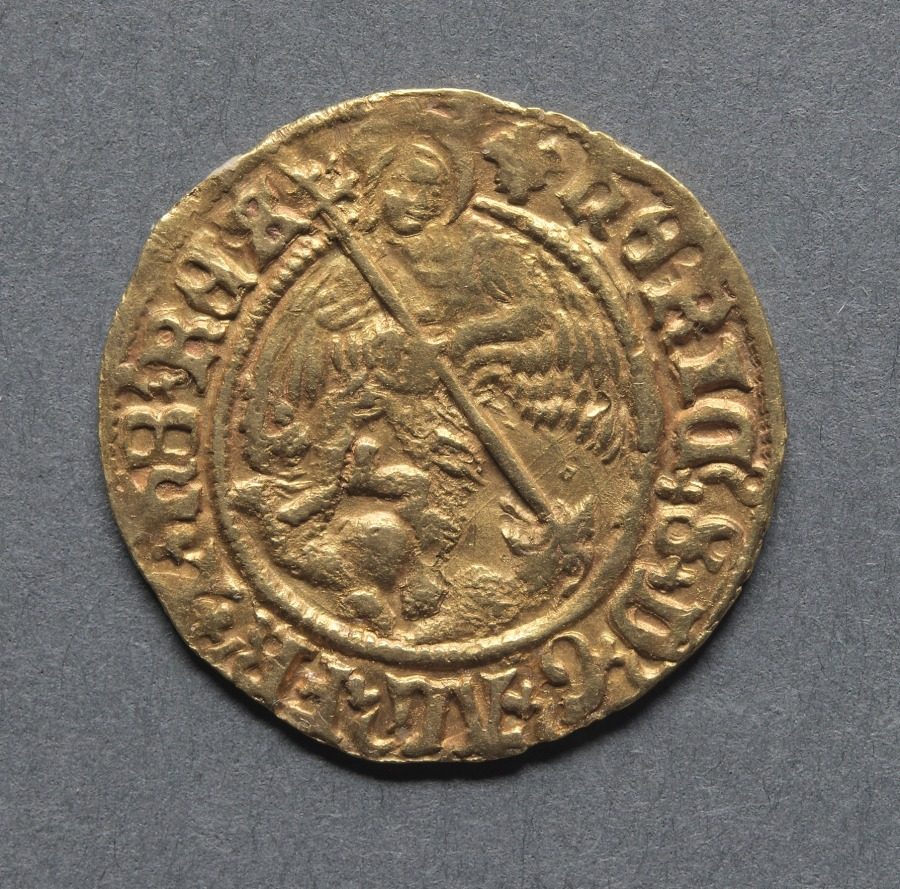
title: Half Angel: Angel Slaying a Dragon (obverse); Ship with Shield of Arms (reverse)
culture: England, Henry VIII, 1509-1547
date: 1526–44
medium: gold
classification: Coins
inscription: HENRIC 8 DG AGL FR Z HIB REX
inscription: O CRVX AVE SPES VNICA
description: During his life Henry VII had accumulated enormous wealth, and it took his son, Henry VIII, until 1542 to squander it. Henry knew the English coinage had been debased in the past and did not see why it should not be debased again, this time for his personal benefit. Full debasement began officially in 1544. The angel varied in value from 6 shillings 8 pence to 11 shillings between Edward's reign and the time of James I. During the reign of Henry VIII, it was valued at seven shillings and six pence (7/6) or 90 pence, the half angel being half that value. The angel was last produced under Charles I in 1642.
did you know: This coin takes its name from the winged angel figure, St. Michael, who is spearing the dragon.